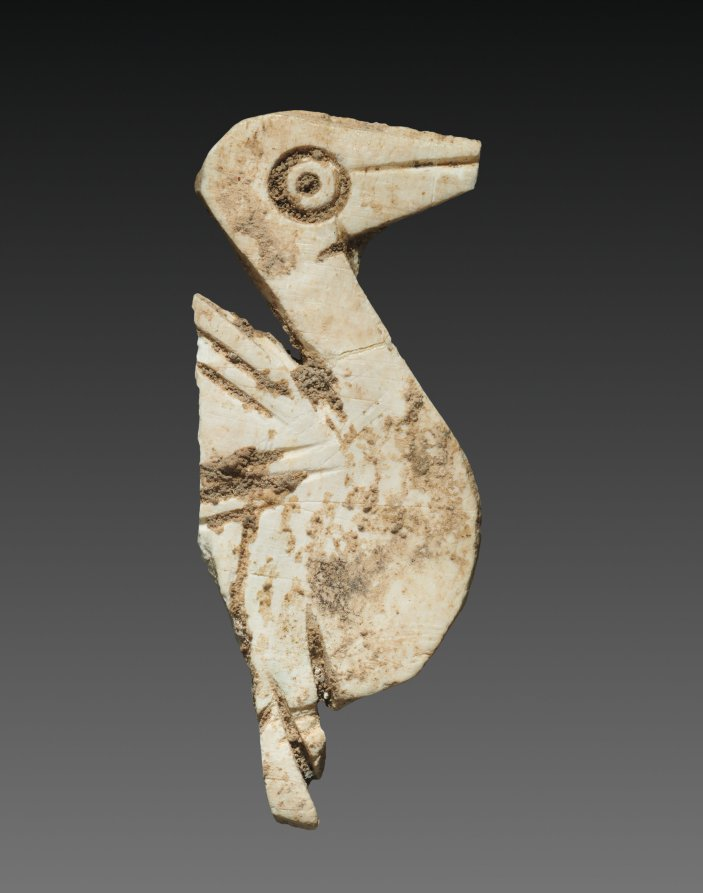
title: Stylized Bird: Decorative Inlay for a Box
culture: Israel, possibly Jericho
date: c. 2000 BCE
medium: bone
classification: Ivory